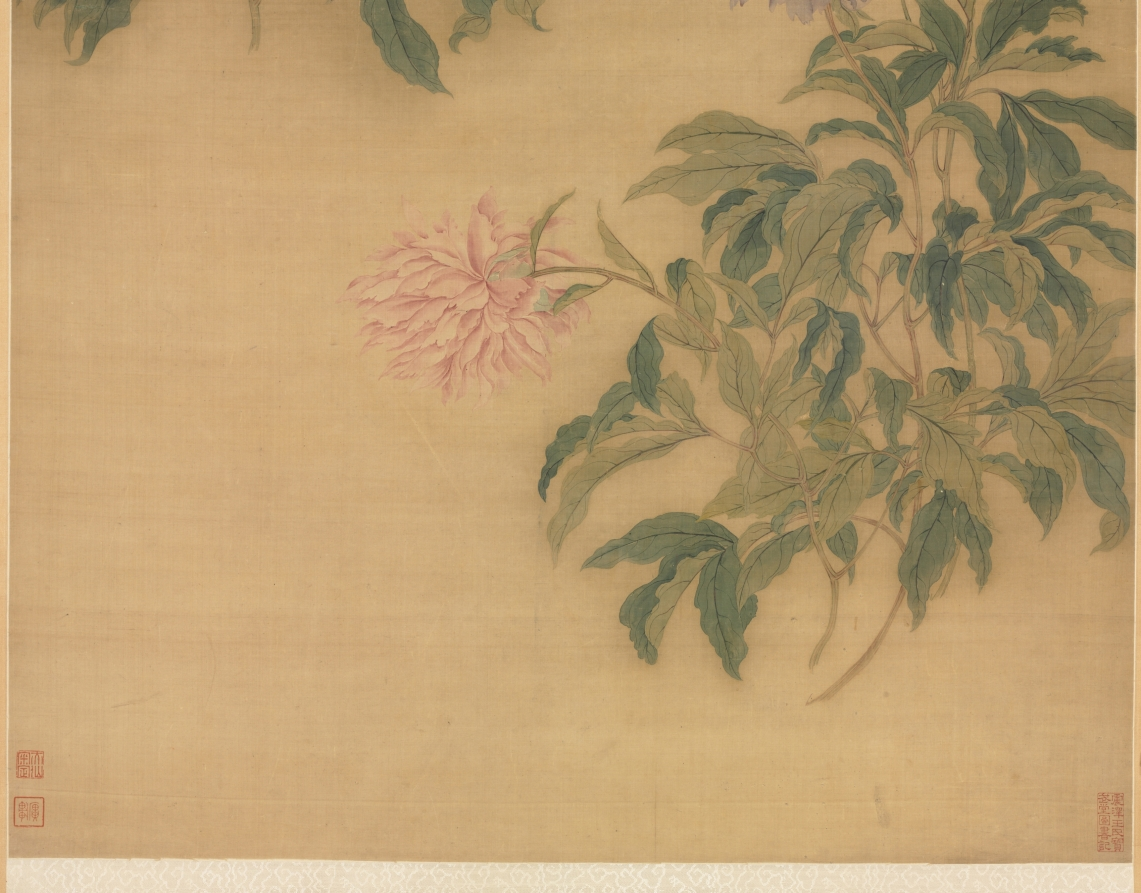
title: Herbaceous Peony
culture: China, Qing dynasty (1644-1911)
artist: Yun Shouping (Chinese, 1633–1690)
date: 1685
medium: Hanging scroll; ink and color on silk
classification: Painting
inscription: Artist's inscription, signature, and 3 seals: An old painting by an anonymous painter of the Northern Song Dynasty has five varieties of flowers painted in the boneless manner. Its colors are so beguiling and beautiful, that even after several hundred years its lead pigments are like new. The skill with which the ink and colors were applied and the subtlety of its composition find no equal among modern followers. On an autumn day in the yichou year [1685], Nantian, Shouping inscribed. [2 seals] Zhengshu; Shouping zhi yin.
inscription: Artist's poem (not translated). Signed Yuange. [seal] Nantian caoyi.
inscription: 3 additional seals of C. C. Wang 王季遷 (1907–2003).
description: Yun Shouping came from Piling (modern Changzhou), Jiangsu province, a center of floral, plant, and insect painting. He had joined the anti-Manchu resistance, was briefly imprisoned, and witnessed the death of family members in 1644. Like other artists, Yun Shouping expressed his Ming loyalism in coded pictures. The peony, king of flowers, and a spring garden motif developed new meaning during the Qing dynasty. The inscription indicates that Yun turns the flower into a motif representing the glorious past. The herbaceous peonies here appear somewhat withered and pale, with faint reddish veins running through its broken branches, perhaps a coded message. The inscription reads, An old painting by an anonymous painter of the Northern Song Dynasty has five varieties of flowers painted in the boneless manner. Its colors are so beguiling and beautiful, that even after several hundred years its lead pigments are like new. The skill with which the ink and colors were applied and the subtlety of its composition find no equal among modern followers.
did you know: In East Asian art, peonies traditionally symbolize prosperity and wealth.